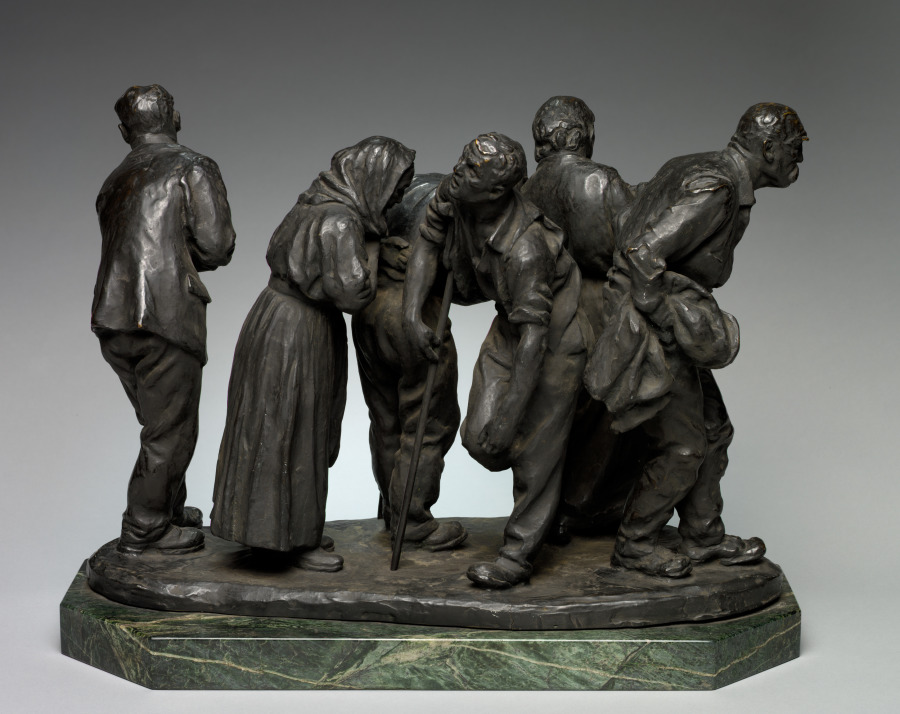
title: The Bread Line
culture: America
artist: Max Kalish (American, born Russian Empire [now Lithuania], 1891–1945)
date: 1926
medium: bronze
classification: Sculpture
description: Sculptor Max Kalish described his motivation behind creating The Bread Line: "My interest in making this group came to me gradually through years of concern with the question of unemployment and poverty." The sculpture's six figures were modeled separately, then arranged together to make the final composition.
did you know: The artist is buried in Mayfield Cemetery, Cleveland.